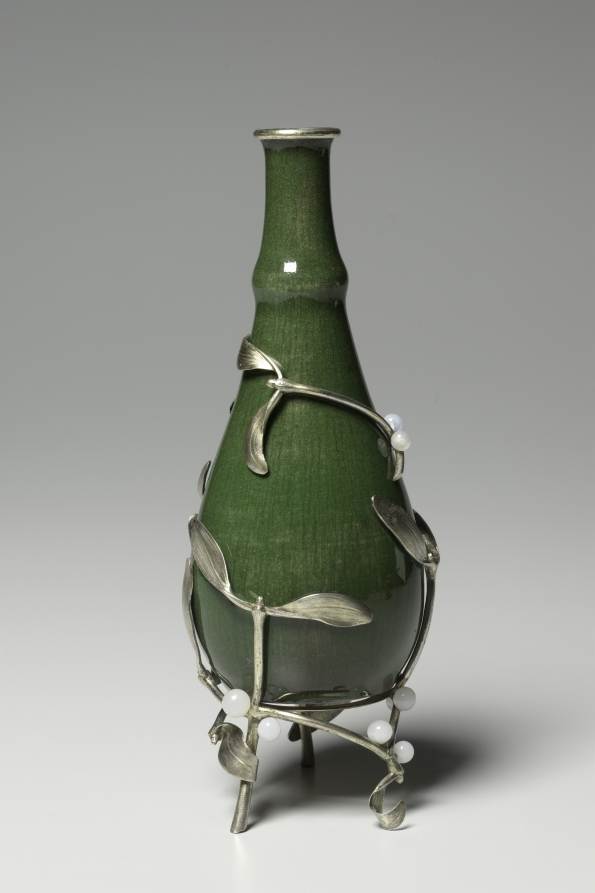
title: Vase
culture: France, late 19th Century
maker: Auguste Delaherche (French, 1857–1940)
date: c. 1893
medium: stoneware with silver mounts and glass beads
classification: Ceramic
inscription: Impressed on bottom of vase: August Delaherche, 1894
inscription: On mount: P. Hamelin 1893